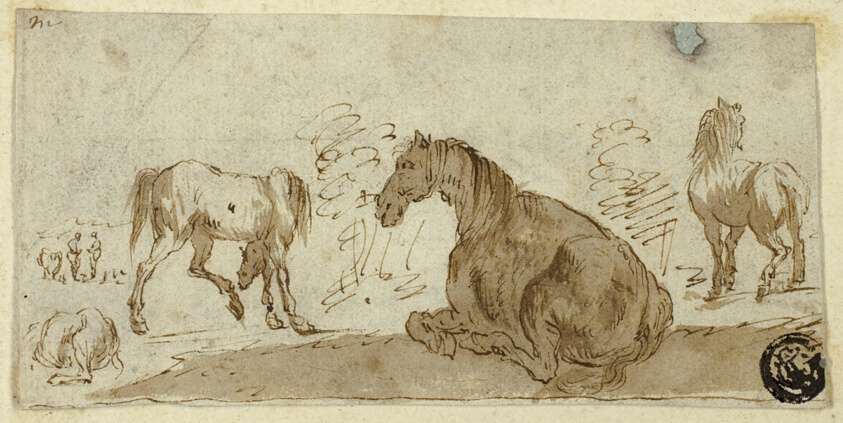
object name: Drawing and Watercolor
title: Studies of Horses in a Landscape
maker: Possibly after Stefano della Bella; Italian, 1610-1664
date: c. 1642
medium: Pen and brown ink, with brush and brown wash, on gray laid paper, laid down on blue laid paper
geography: Italy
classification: pen and ink drawings; drawings (visual works); prints and drawing